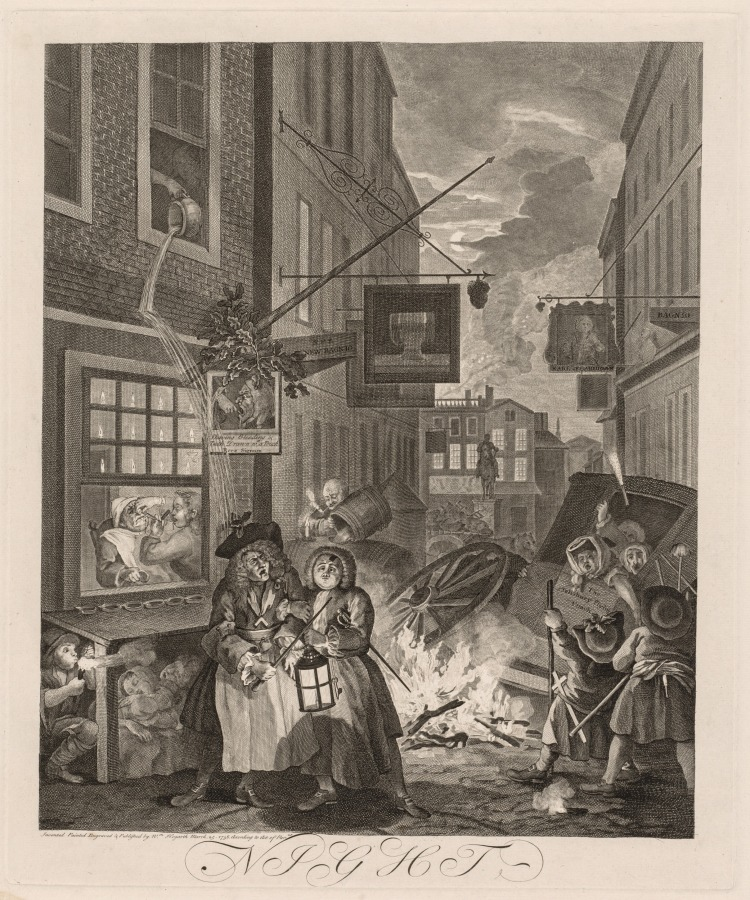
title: The Four Times of Day: Night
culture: England, 18th century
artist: William Hogarth (British, 1697–1764)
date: 1738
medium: engraving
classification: Print